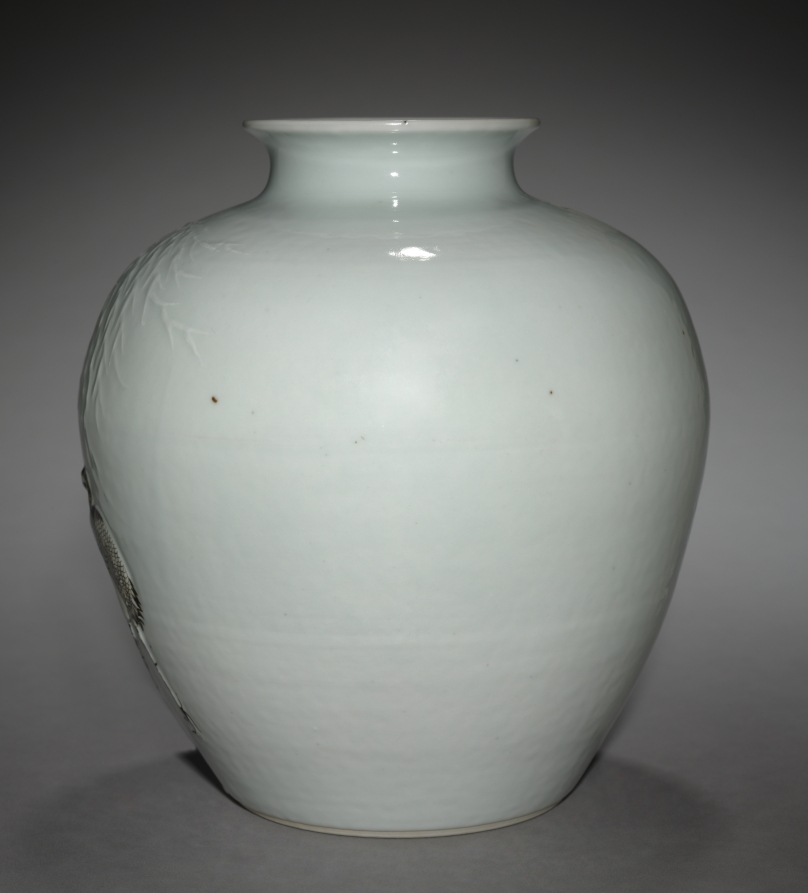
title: Jar with Crane and Willow in Relief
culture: China, Jiangxi Province, Jingdezhen kilns, Qing dynasty (1644–1911)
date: 1700s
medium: porcelain with raised and overglaze enamel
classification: Ceramic